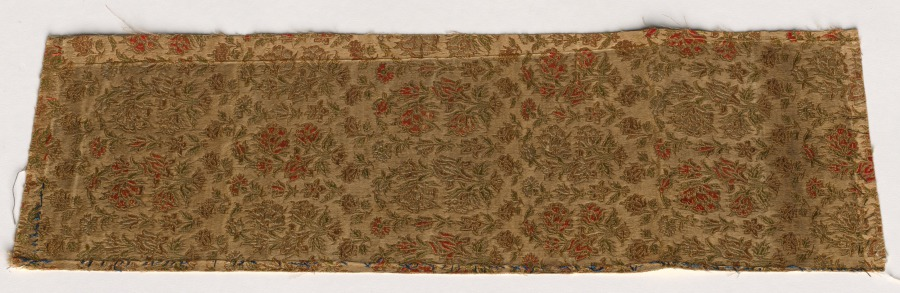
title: Textile Fragment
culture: Japan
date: 1800s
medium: silk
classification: Textile